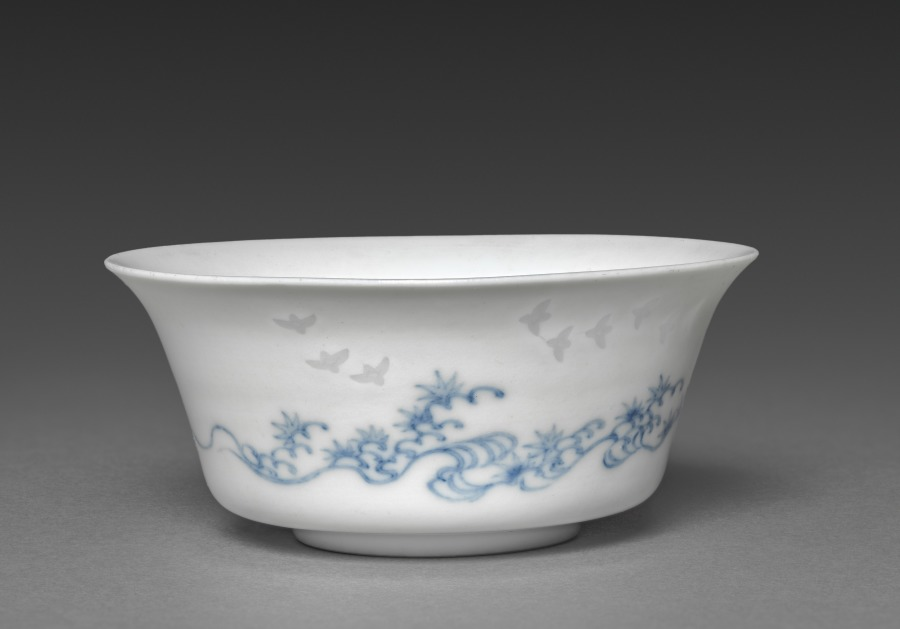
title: Wine Cup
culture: Japan, Edo period (1615–1868)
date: 1700s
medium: porcelain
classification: Ceramic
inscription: inscription in underglaze blue on base.